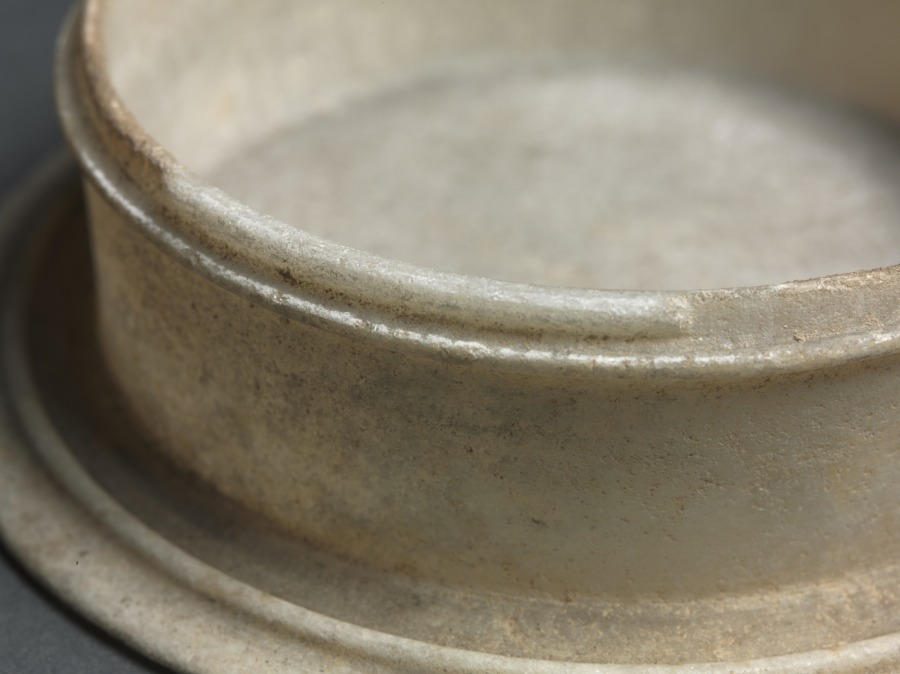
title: Pyxis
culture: Greece, Attic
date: 400–300 BCE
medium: marble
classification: Stone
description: Pyxides came in a huge variety of sizes, shapes, and materials in the ancient world. Images of pyxides in Greek art often show them being used by women, which has led scholars to believe that they may have been used to hold jewelry or cosmetics. This pyxis is one of few surviving examples made from stone, signifying that it may have had an elite owner.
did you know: This vessel has a threaded lid, like a modern mason jar, allowing it to be tightly sealed.